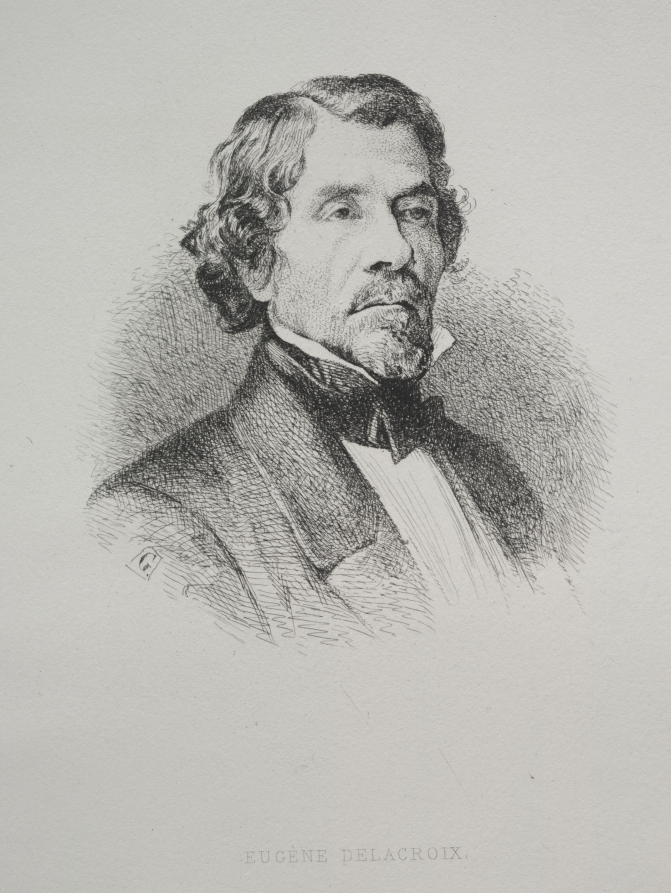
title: Eugène Delacroix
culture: France, 19th century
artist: Jean François Gigoux (French, 1806-1894)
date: 1800s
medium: etching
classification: Print